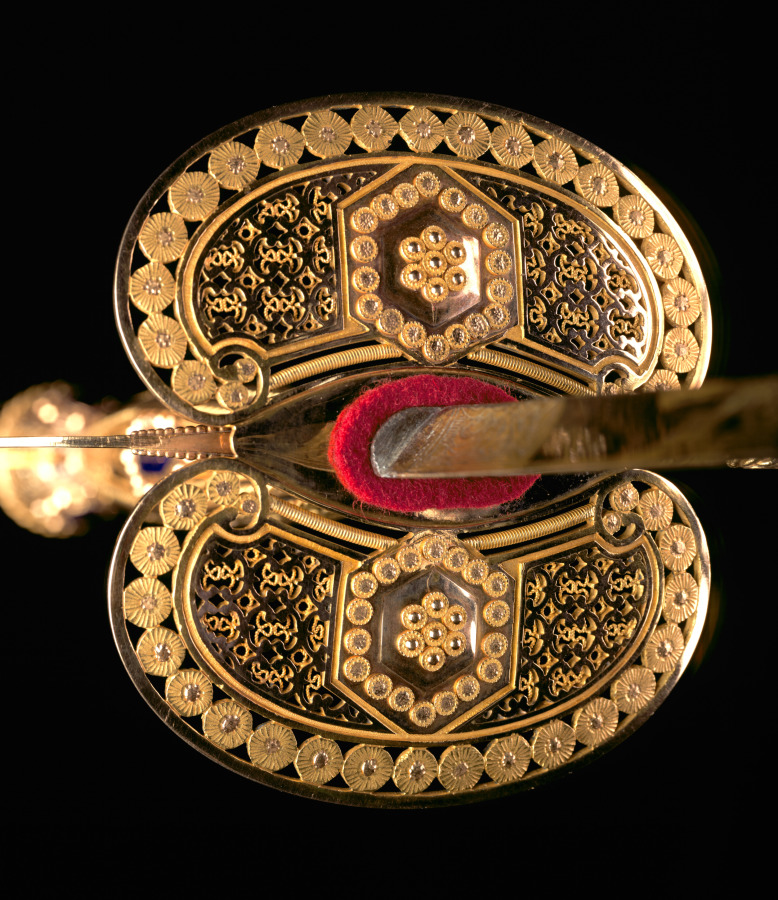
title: Small-Sword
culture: Switzerland, Geneva(?) (blade: Germany, Solingen, early 18th c.), late 18th Century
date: c. 1790–1800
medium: hilt: gold with blue translucent enamel; blade: etched, blued and gilded steel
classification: Arms and Armor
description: This example shows the small-sword at its latest and most refined stage of development. Though highly reflective of French taste, it was probably fashioned in a Swiss workshop under French influence or by a French craftsman working in Switzerland. Worn publicly as an emblem of social rank, this sword was likely custom-made for an affluent individual to use on formal or court occasions. So-called because of its short blade, the small-sword emerged as the light and quick weapon of choice for aristocratic civilians during the 1700s. Such a sword was traditionally suspended at about mid-thigh from the left side of a belt, the hilt exposed through the opening of the gentleman's coat. Highly visible, the hilt invited lavish decoration through precious materials such as gold and enamels, as seen here. Considered a type of masculine jewelry at that time, small-swords featured a variety of hilt styles that went in and out of fashion. Many were decorated to match personal costume, and jewelers worked on the finest small-swords of the day.